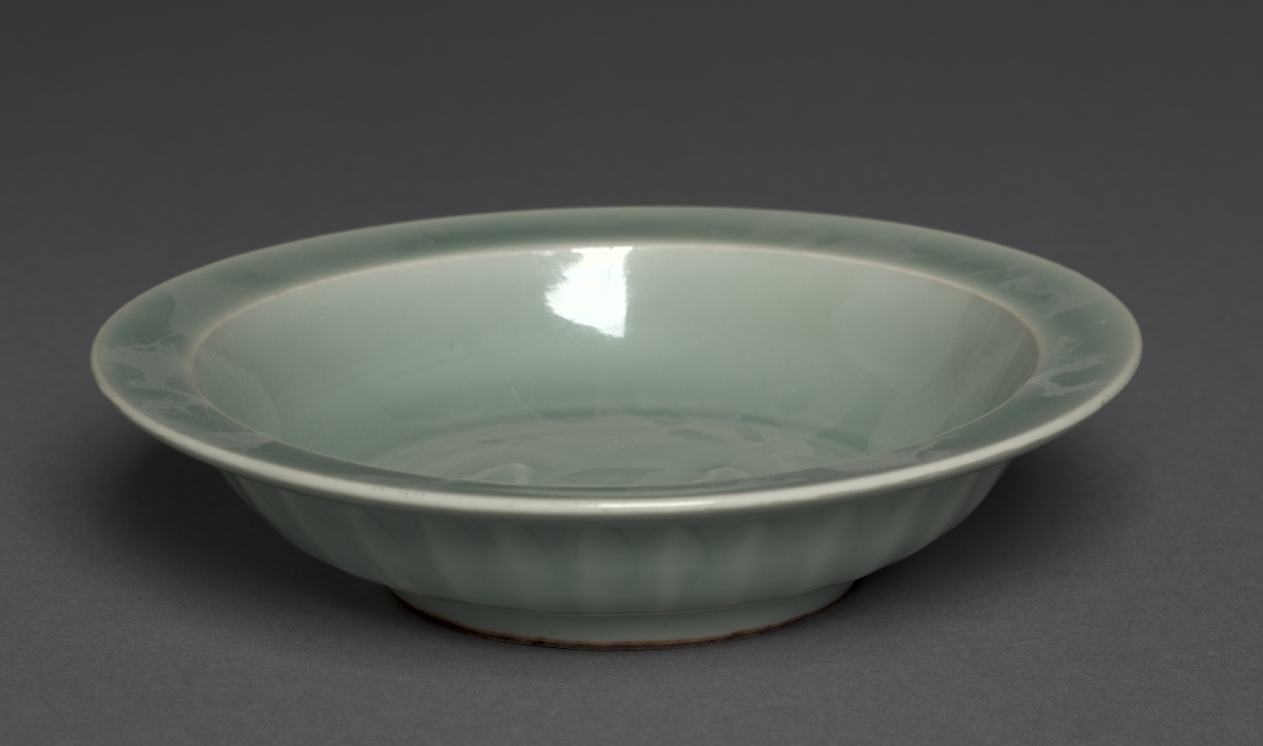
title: Dish with Two Fish in Relief: Longquan Ware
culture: China, Zhejiang province, Southern Song dynasty (1127-1279)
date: mid-1200s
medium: glazed porcelain with molded decoration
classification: Ceramic